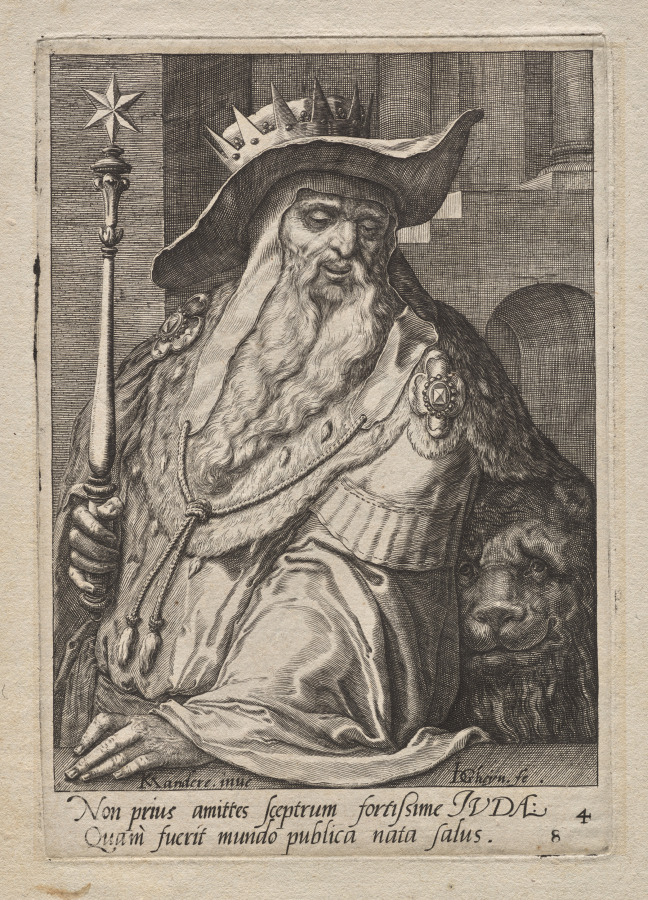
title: Plate 4: Judah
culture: Netherlands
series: The Twelve Sons of Jacob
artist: Jacob de Gheyn II (Netherlandish, 1565–1629)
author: after Karel I van Mander (Netherlandish, 1548–1606)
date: c. 1589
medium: engraving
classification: Print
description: In this print, the biblical figure Judah is posed in a ceremonial robe with a lion and holding a scepter, symbolizing his power, bravery, success in battle, and leadership. This is one of a series of prints depicting the twelve sons of Jacob, each with an attribute and costume that denotes his character. According to the Old Testament, Jacob blessed each of his twelve sons, prophesizing the destiny of their tribe, and assigning them a parcel of land in Canaan. The print series was made in the Netherlands in the late 16th century, a time of political struggle when Old Testament heroes were popular exemplars of fortitude and patience.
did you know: The crown atop the hat of this Old Testament figure symbolizes his status as an ancestor of Kings David and Solomon.